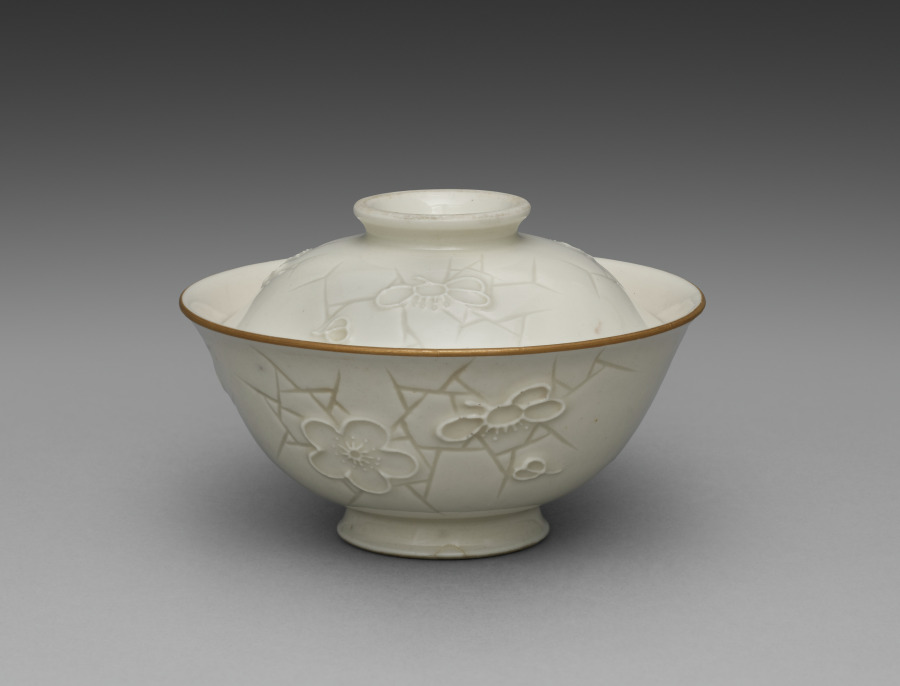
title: Covered Bowl from Dining Set with Plum Blossoms and Cracked-Ice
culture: Japan, Meiji period (1868–1912)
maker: Seifū Yohei II (Japanese, 1844–1878)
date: c. 1875–78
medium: Porcelain with molded designs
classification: Ceramic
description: Each item in this set has a delicate low-relief design of flowering plum branches over scattered, intersecting lines meant to resemble the cracked-ice surface of a frozen body of water and is signed on the base in gold pigment. While Yohei II produced many fine works in underglaze blue, like those produced by Kiyomizu Shichibei, he also made works in quite different styles later in his career, from the early 1870 s. In 1873, he was appointed purveyor to the Industrial Center of Kyoto Prefecture, a designation associated with Kyoto’s efforts to reach an international market through the port of Kobe; and from 1875 until his death, he was involved in national-level projects to present Japanese ceramics across the world. It was during this period that Yohei III was apprenticed to Yohei II, and it has been suggested that this set may in fact be an early example of Yohei III’s work, which he signed with his teacher’s name. Decorated with flowers resembling Japanese textile motifs, the set calls to mind the design of Yohei II’s pair of vases with plum blossoms in the Victoria and Albert Museum. Here, the elaborate trees created for a formal public exhibition setting have been translated into the approachable blossoms of the genteel domestic environment. While the designs are consistent across the pieces, each raised flower petal and pistil and each incised line in the ice was done by hand, so the cups, bowls, and dishes are similar yet unique. The bottoms of two boxes once identified the set’s owner, but the information has been deliberately obscured with black ink. However, inscriptions still visible appear to indicate two occasions, once at the end of July 1886 , and once again in June 1916 , when parts of the set were requested from Hokura in Niigata Prefecture. The location corresponds to a neighborhood in the present-day city of Jōetsu. The surname Tsuji 辻 also appears on a paper tag affixed to one of the box cloths. Future research may possibly reveal more about their provenance. A vase by Yohei III in a private collection combines the formal grandeur of the Yohei II vases in the Victoria and Albert Museum with the gentler design of this dining set, placing flowering plum trees against soft, scalloped-edge clouds resembling those in golden screens.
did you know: The dining wares have a creamy white coloration that the four boxes containing them identify as Korean in style.